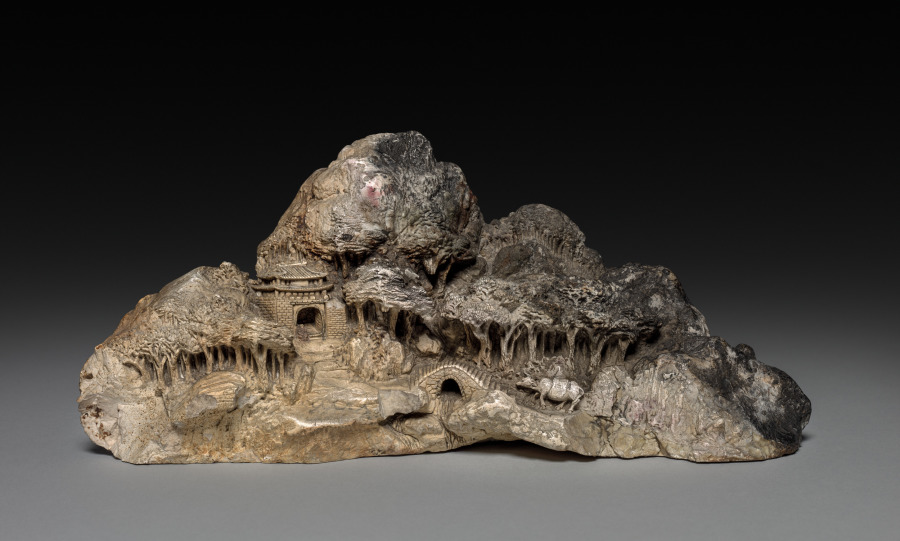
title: Mountain and Landscape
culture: China, Qing dynasty (1644-1911)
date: 1800s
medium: carved stone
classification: Jade